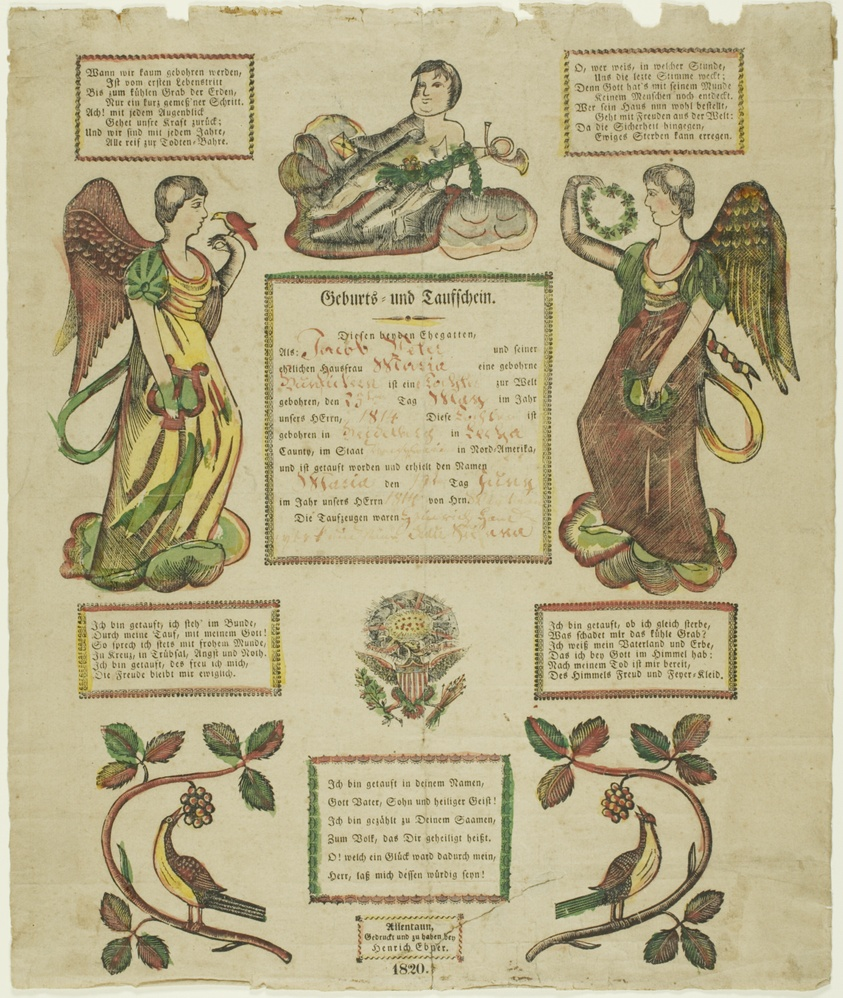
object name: Print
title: Birth and Baptism Certificate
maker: printed by Heinrich Ebner; American, 1783-1850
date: 1814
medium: Woodcut on paper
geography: United States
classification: woodcut; print; prints and drawing